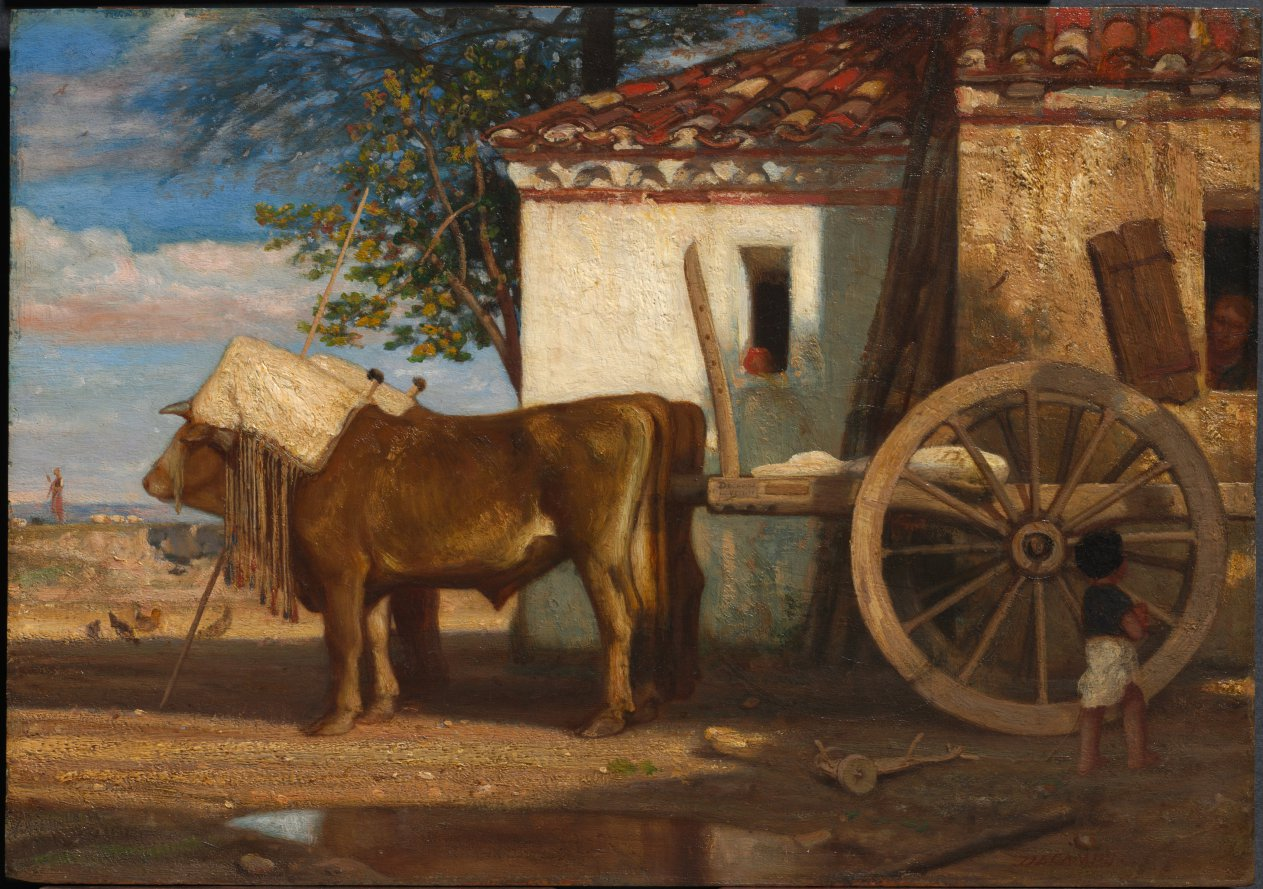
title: Oxen before a Farmhouse at Le Verrier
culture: France, 19th century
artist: Alexandre-Gabriel Decamps (French, 1803–1860)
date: c. 1853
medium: oil on wood panel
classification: Painting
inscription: Signed: lower right in red: decamps.; on cart: Decamps / au Veirier; on sac laying on cart: dc